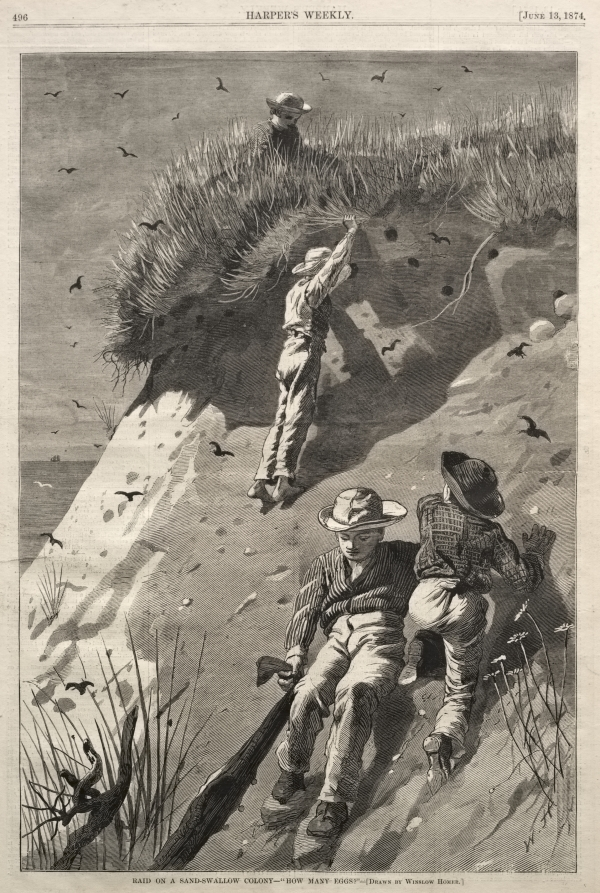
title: Raid on a Sand-Swallow Colony - "How Many Eggs?"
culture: America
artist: Winslow Homer (American, 1836–1910)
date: 1874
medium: wood engraving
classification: Print